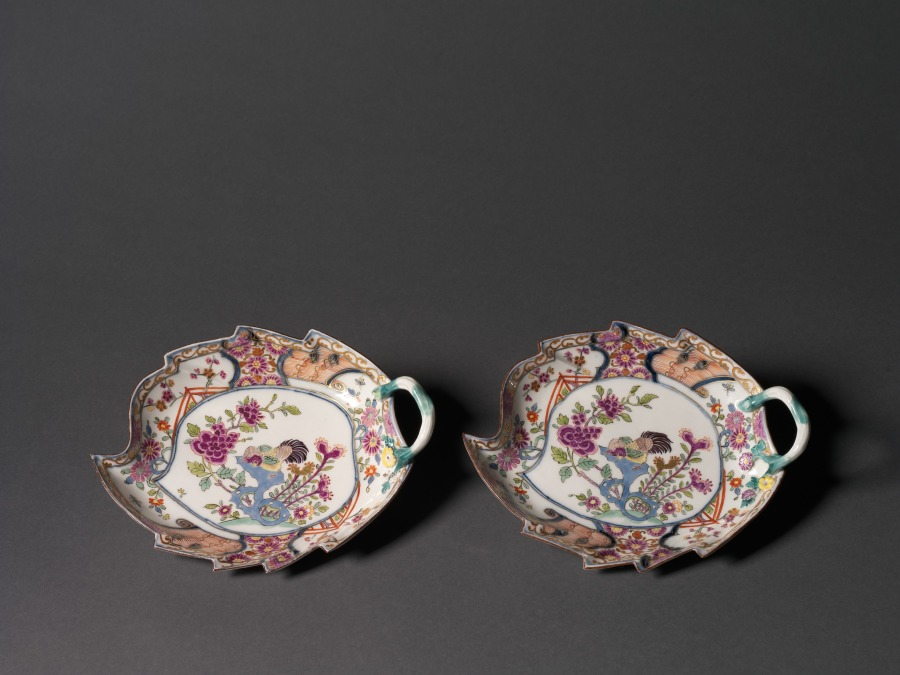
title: Leaf Dishes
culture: Germany, Meissen, 18th century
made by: Meissen Porcelain Factory (German, est. c. 1710)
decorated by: possibly by Johann David Kretschmar (German)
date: c. 1735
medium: porcelain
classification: Ceramic